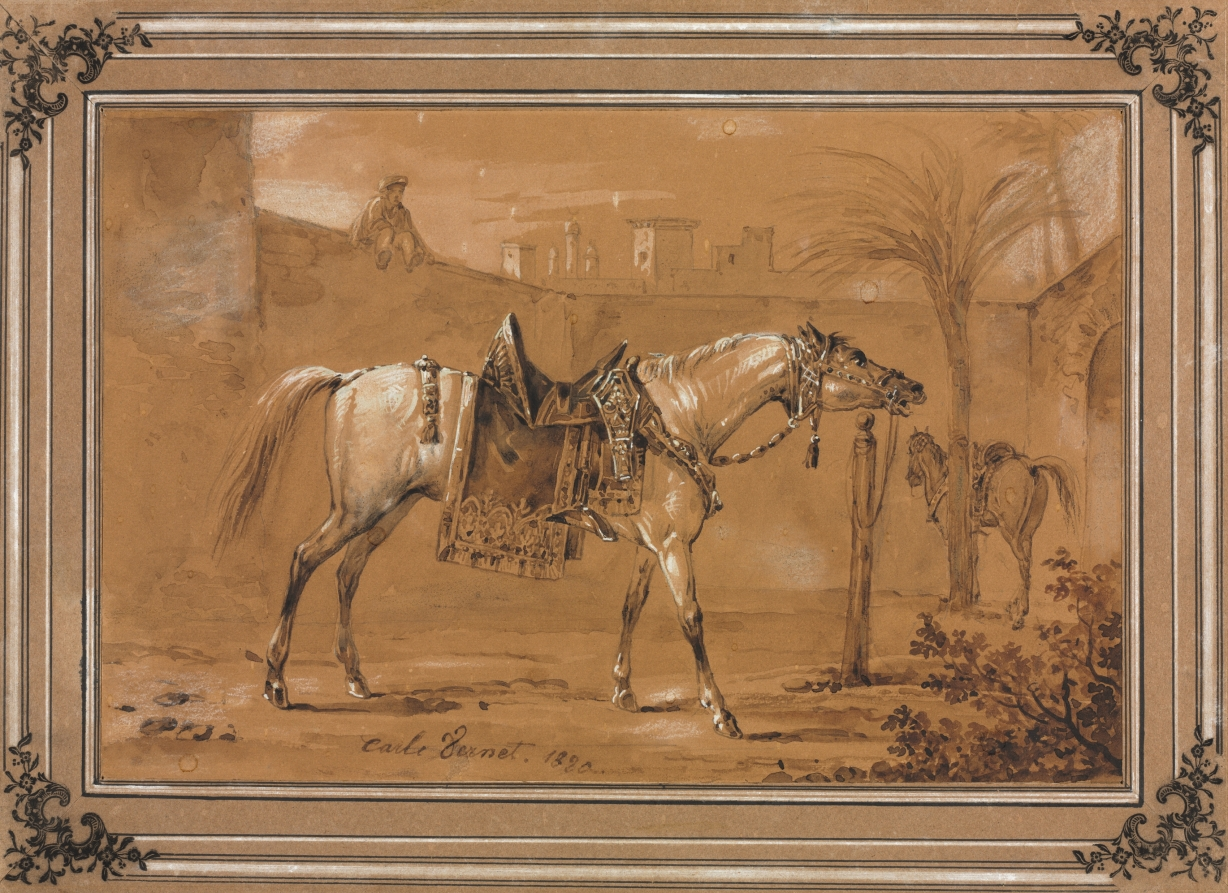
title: Saddled Arabian Horse in Courtyard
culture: France, 19th century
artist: Carle Vernet (French, 1758–1836)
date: 1820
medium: pen and brown ink, brown wash, with gray wash, over black chalk or crayon, heightened with white gouache and white chalk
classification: Drawing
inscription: signed, lower left, in brown ink: Carle Vernet. 1820.; verso of secondary support, upper right, in graphite: super duper; lower center, in graphite: russian stamp [sideways] / [arrow]; lower right, in graphite: #6 [circled].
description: While his father, Joseph, was known for marine paintings, and his son, Horace, became a celebrated Romantic artist, Carle Vernet excelled in representing battles and animals, especially horses. Vernet was an expert rider himself, and in his pictures he precisely described various breeds and horse dressings. Although the artist never traveled further from France than Italy, his drawing of an Arabian horse contains elements that make it seem as if he observed the animal in its native environment. He documented the unique saddle and included exotic architecture in the background and palm trees at the right. Vernet was able to study exotic breeds and costumes in Paris, both in the military corps and at the horse races.